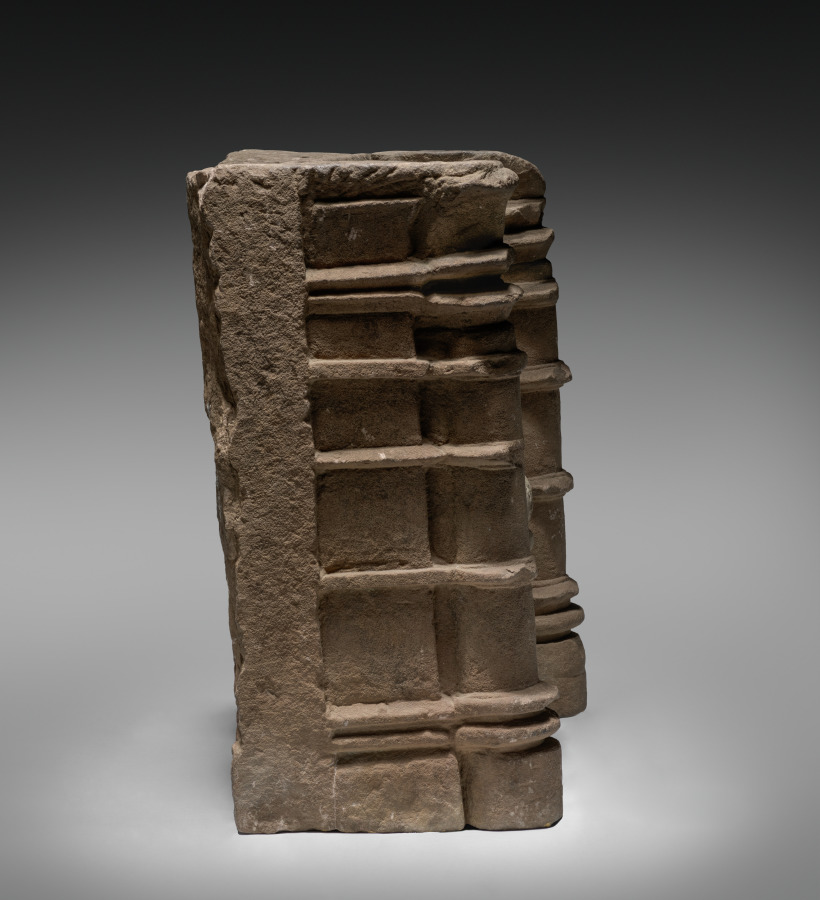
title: Eight Armed Shiva Dancing Between Two Pillars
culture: India, Rajasthan, Chandela Dynasty, 10th - 11th century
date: 900s–1000s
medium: sandstone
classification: Sculpture